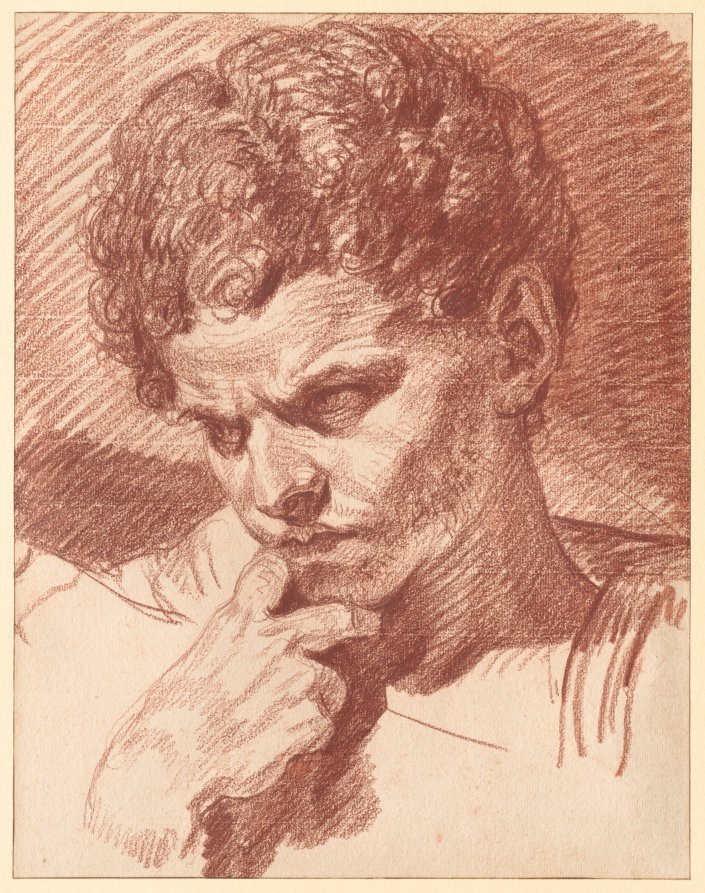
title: Head of Caracalla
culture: France, 18th century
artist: Jean-Baptiste Greuze (French, 1725–1805)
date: c. 1768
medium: Red chalk on cream laid paper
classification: Drawing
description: As part of their training in the late 18th century, French artists practiced drawing têtes d'expression, or expressive heads, that display subtleties of human emotion. Greuze made this chalk study in preparation for a painting in which the Roman emperor Septimius Severus rebukes his notoriously ruthless son, Caracalla, for attempting to assassinate him. Although Greuze based this face for the figure of Caracalla on a Roman portrait bust, he imaginatively adapted the facial expression to dramatize Caracalla’s resentment and humiliation during the confrontation.